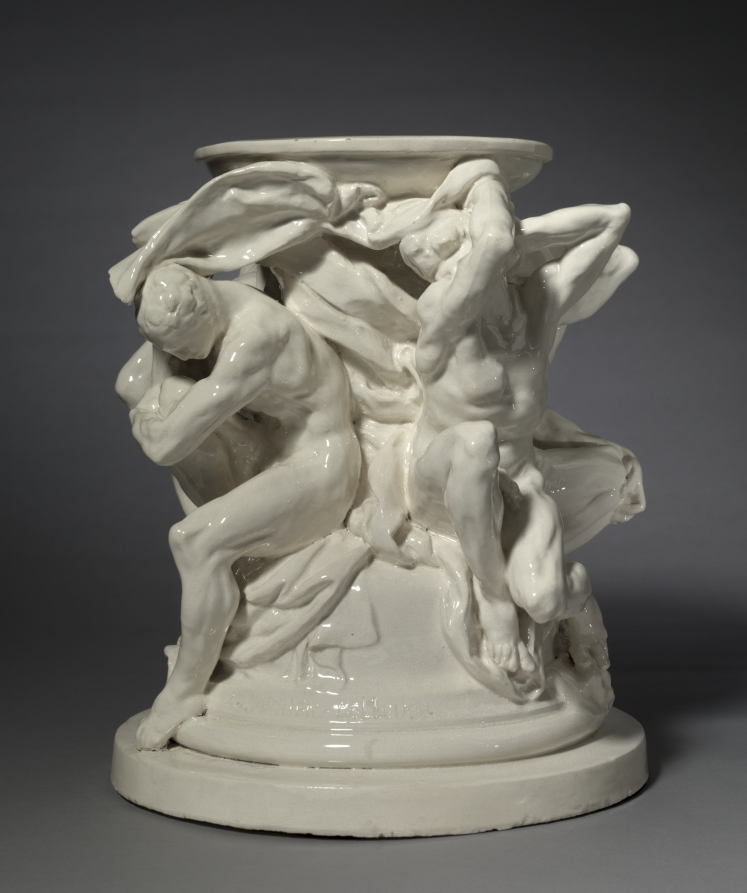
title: Titans, Support for a Vase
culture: France, made at Choisy le Roi, 19th century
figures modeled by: Auguste Rodin (French, 1840–1917)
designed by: probably by Albert-Ernest Carrier-Belleuse (French, 1824–1887)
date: c. 1877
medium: glazed earthenware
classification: Ceramic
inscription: incised near bottom of plinth: "A. CARRIERE-BELLEUSE."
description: During his lifetime and afterward, Auguste Rodin was viewed as the modern equivalent to Michelangelo. Rodin worked against the prevailing styles of his time and may have seen parallels between his own struggles and Michelangelo’s reputation in the 1800s as a suffering genius. In 1875 Rodin went to Italy to study Renaissance art, specifically works by Michelangelo. The twisting titans (giants) on this pedestal base are directly inspired by Michelangelo’s ignudi (male nudes) on the Sistine Chapel ceiling. Rodin did not directly copy the poses but translated the energy and movement of the nudes into new, three-dimensional forms.